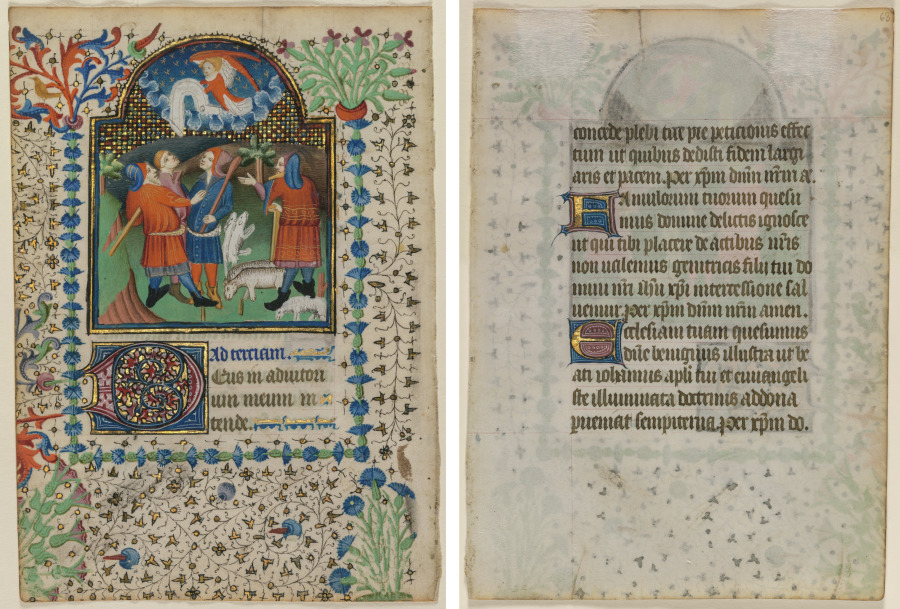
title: Leaf from a Book of Hours: Annunciation to the Shepherds (recto) and Text (verso)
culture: France, Paris (?), 15th century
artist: Boethius Illuminator (Flemish, active c. 1414–20)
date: c. 1410–20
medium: ink, tempera and gold on vellum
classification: Manuscript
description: This finely preserved leaf with its large miniature is stylistically consistent with the work of the Boethius Illuminator. An unusual and very original painter, he was named after a manuscript copy of the works of the Roman philosopher Boethius (AD 480-524), which he illuminated in 1414. The artist favored bright, sweeping colors and expressionistic compositions. He used tessellated (mosaic-patterned) grounds in his miniatures, as is the case here. The Boethius Illuminator and his assistants participated in the illustration of over a dozen manuscripts between 1414 and 1418/20. It was not unusual for artists working in different styles to collaborate on a single book of hours during the 1400s and 1500s.